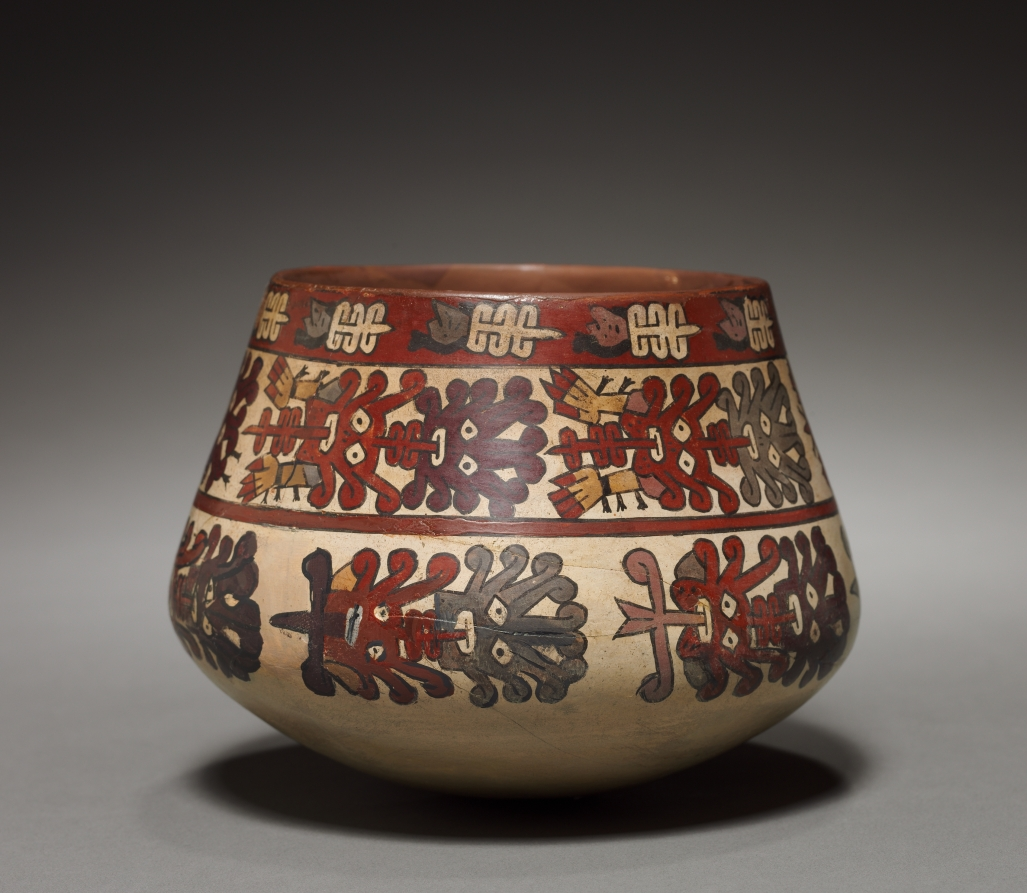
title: Vessel with Abstract Heads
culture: Peru, South Coast, Nasca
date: 100 BCE–700 CE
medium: earthenware with colored slips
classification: Ceramic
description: Late Nasca supernatural depictions became abstract, detailed, and focused on the head. In this vessel's central register, for instance, a deity is reduced to two mask-like faces, edged by volutes and linked by tongues; the only remains of a body are the hands. The lower register carries a similar image, and the upper register has severed human heads.